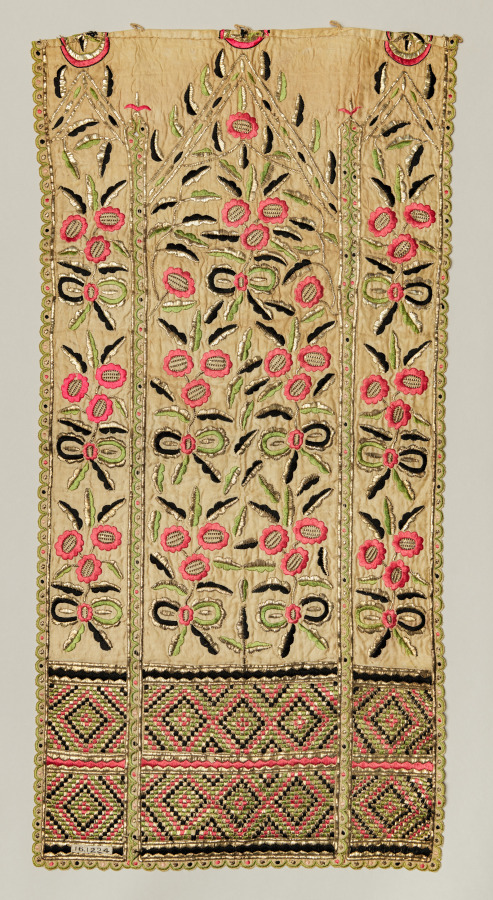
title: Fez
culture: Africa, North Africa, Algeria, Algerian embroiderer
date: early 1900s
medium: Silk, metal threads, dye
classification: Embroidery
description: This textile is made of plain weave silk, and embroidered with dyed silk threads and flat, metal strips that pass through both layers of this cloth. The textile is reversible (save for some details on the rosettes). Its form is unusual, but resembles a hanging (note the small loops along the top edge) or doorway partition, with its three flaps suitable to let a breeze pass through. The pattern of broad rosettes is widespread across the Mediterranean in the late 19th and early 20th century.